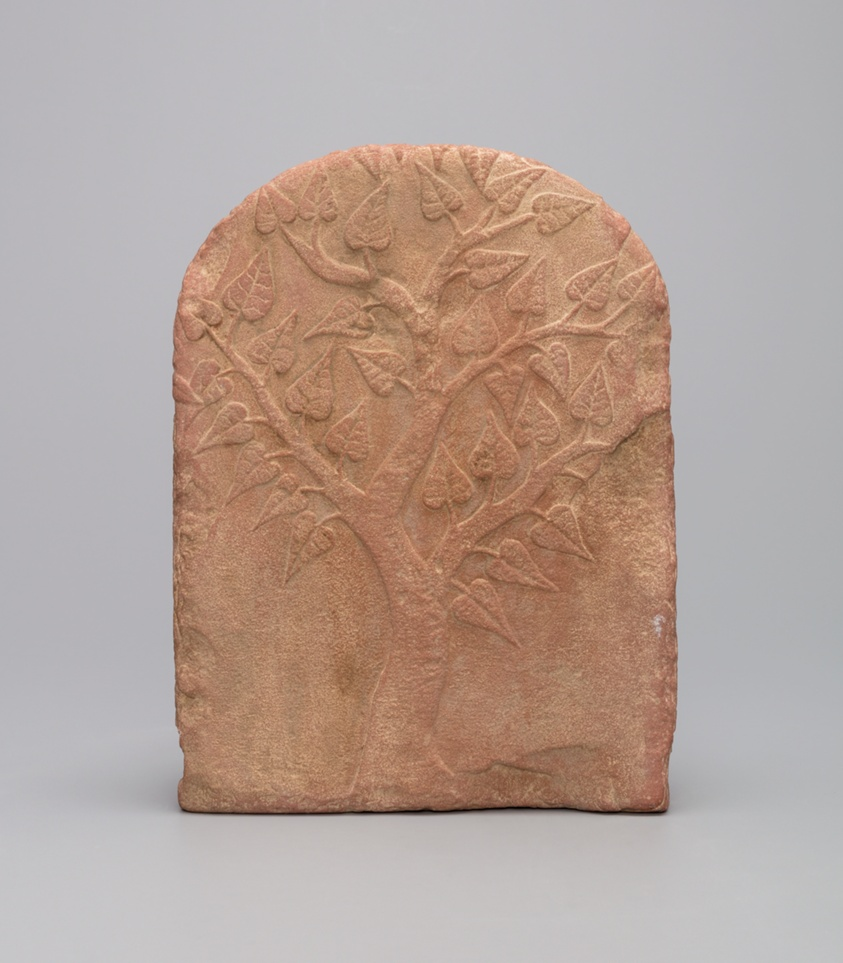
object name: Sculpture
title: Buddha Shakyamuni with Attendants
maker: India; Uttar Pradesh, Mathura region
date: Kushan period, 2nd century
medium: Sandstone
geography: Mathura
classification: sandstone; stone; sculpture; asian art